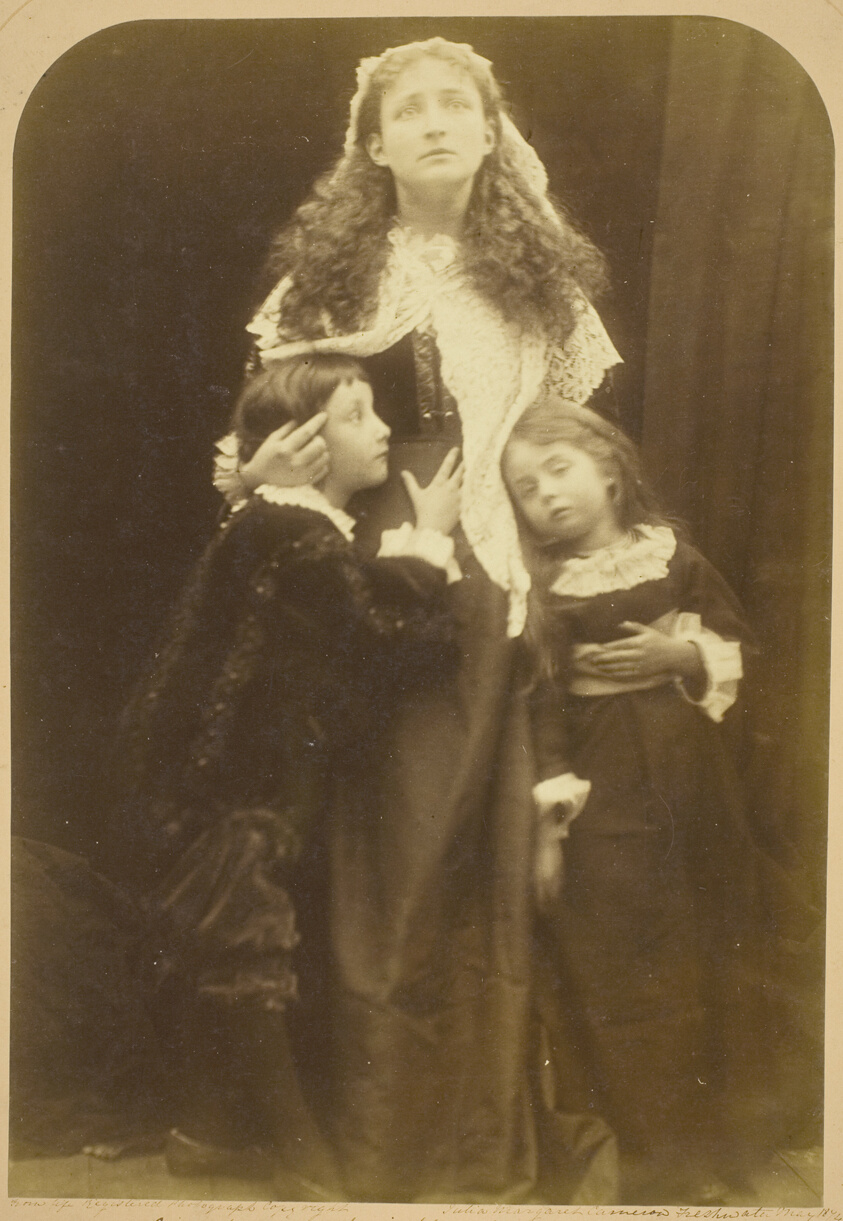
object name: Photograph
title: Queen Henrietta Maria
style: 19th century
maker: Julia Margaret Cameron (English, 1815–1879)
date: May 1874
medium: Albumen print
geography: England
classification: albumen silver print; photographic process; photography; photograph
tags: portraits, portraits: female subject, photography, portraits: multiple subjects, portraits: child subject, mothers, children, kings, queens